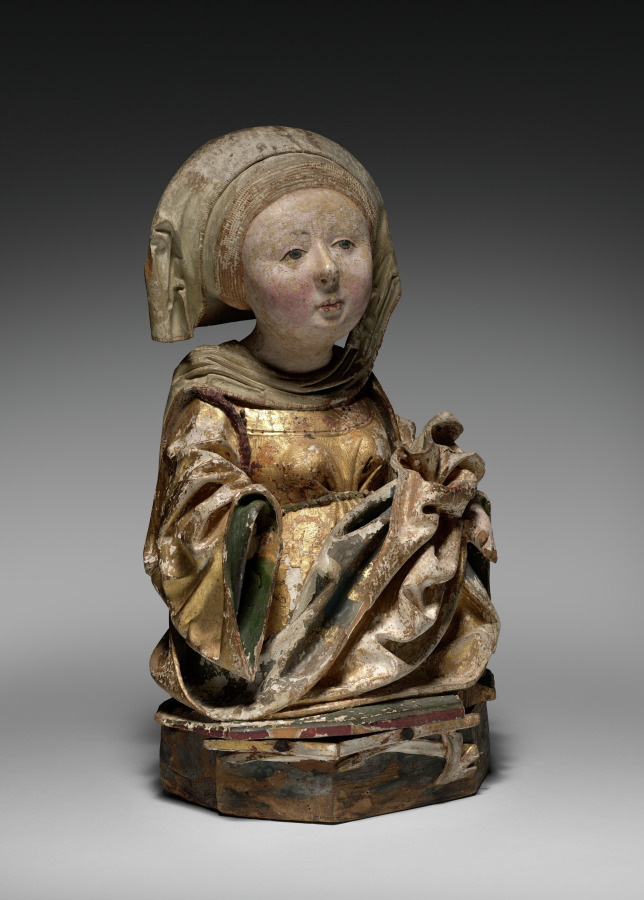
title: Female Bust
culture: Austria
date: c. 1470–1500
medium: Painted and gilded lindenwood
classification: Sculpture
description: This female bust is part of a series of three in the museum's collection. The identity of the figures has been speculated by scholars but without resolution. Because this and the other female busts in the series do not retain their attributes, it is difficult to know their original purpose. It is possible that they may have once formed a group of female saints from the predella of a large altarpiece. Since the sculpture is not carved in the round, this hypothesis has merit. Another recent proposal is that this and the other sculptures may be from a series of female busts representing the wise and foolish virgins referenced in Matthew 25:1-13, a parable by Jesus admonishing listeners to be spiritually prepared.